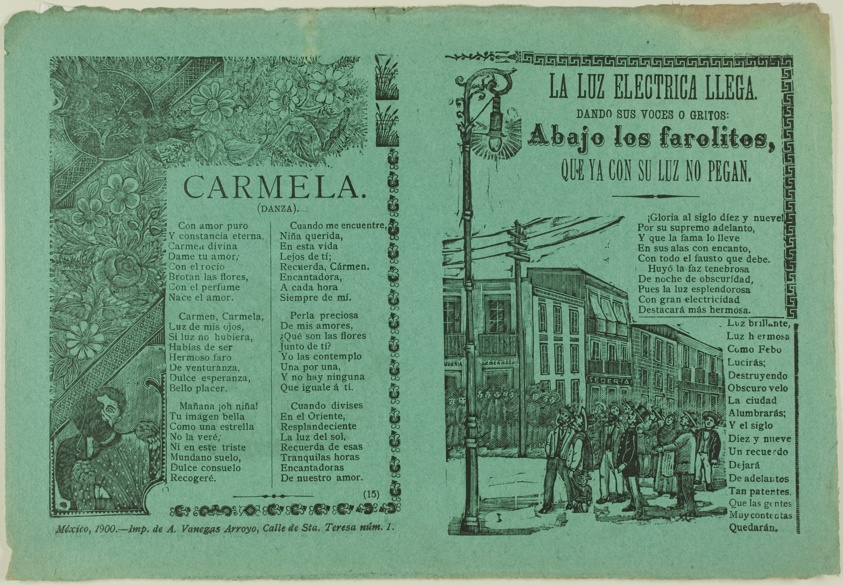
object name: Print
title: Electric Light Arrives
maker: Manuel Manilla (Mexican, 1830-c. 1900)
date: 1900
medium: Relief engraving or photo relief etching on green wove paper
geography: Mexico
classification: relief etching; print; prints and drawing